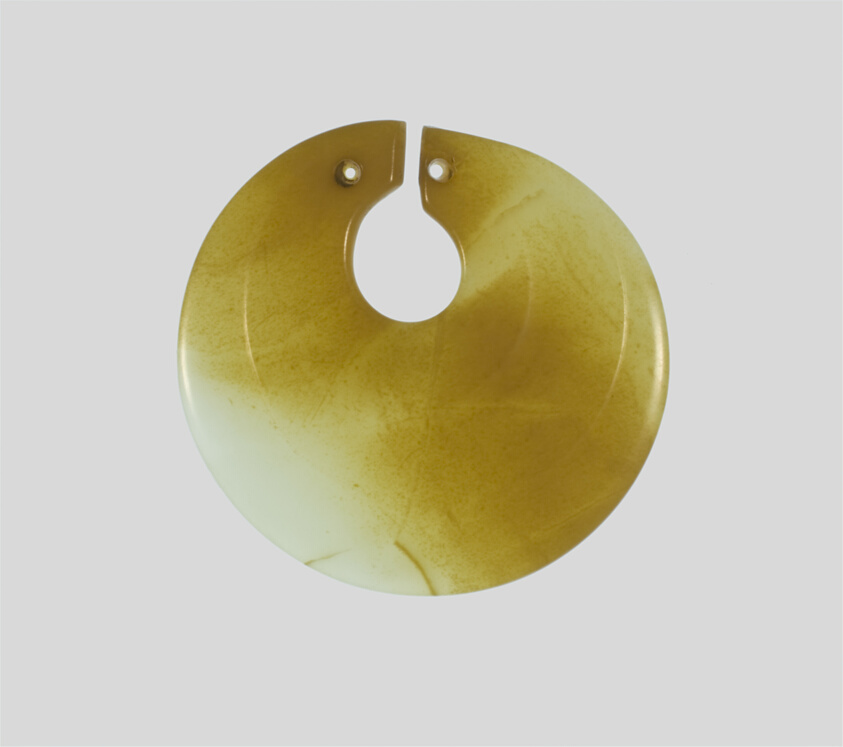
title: Slit Disc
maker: China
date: Shang dynasty (c. 1600–1046 B.C.)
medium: Jade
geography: China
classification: jade; asian art